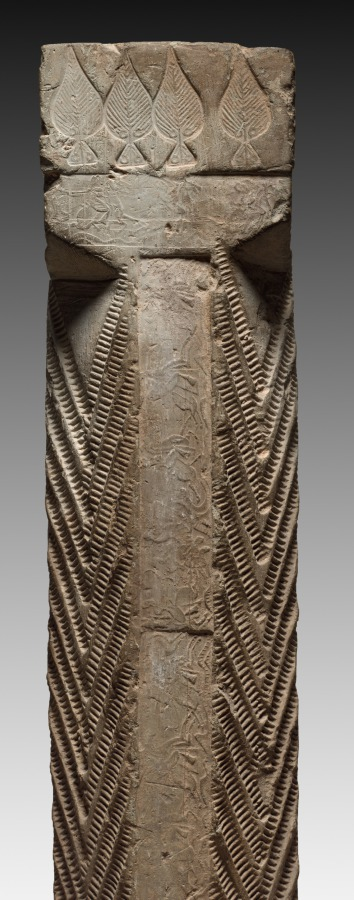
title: Hollow Tile: Column from Tomb-Chamber Doorway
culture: China, Han dynasty (202 BCE–220 CE)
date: 100–200 CE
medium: earthenware, die-stamped relief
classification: Ceramic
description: Striding tigers (top), racing horsemen (right column), and reverent officials (left column) are stamped into the surface of this underground portal to a tomb. The doorway preserves in stone the post-and-lintel structure, a basic element of Chinese wooden architecture. By the first century CE, a revolution in Chinese tomb construction and furnishing had taken place. Tombs lined with decorated bricks and tiles replace the earlier tombs constructed with only rammed-earth walls. Ceramic surrogates or models of stoves, houses, servants, and pets filled these more durable chambers, symbolically extending the creature comforts of this world into the world after death.